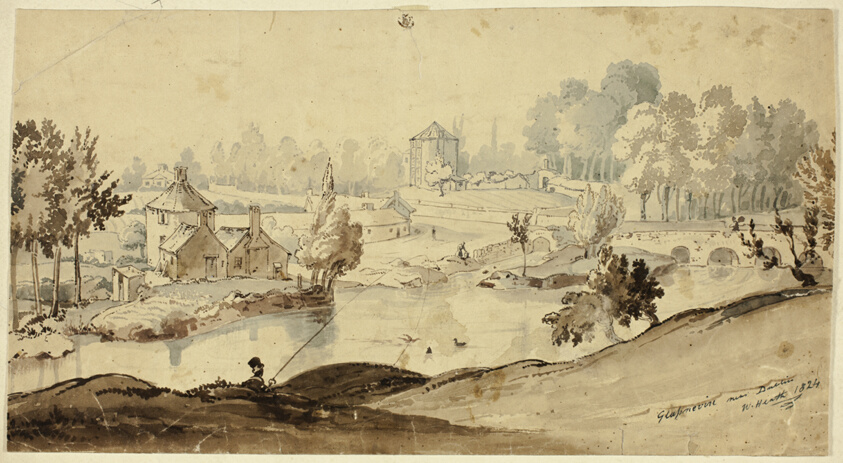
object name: Drawing and Watercolor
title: Glasnevin Near Dublin (recto); Sketch of Man's Costume (verso)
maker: Attributed to William Heath; English, 1795-1840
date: 1824 (recto); c. 1824 (verso)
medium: Brush and brown and blue ink and wash, on tan wove paper (recto), and graphite on cream wove paper (verso), tipped onto cream wove paper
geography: England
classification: watercolor; drawings (visual works); prints and drawing